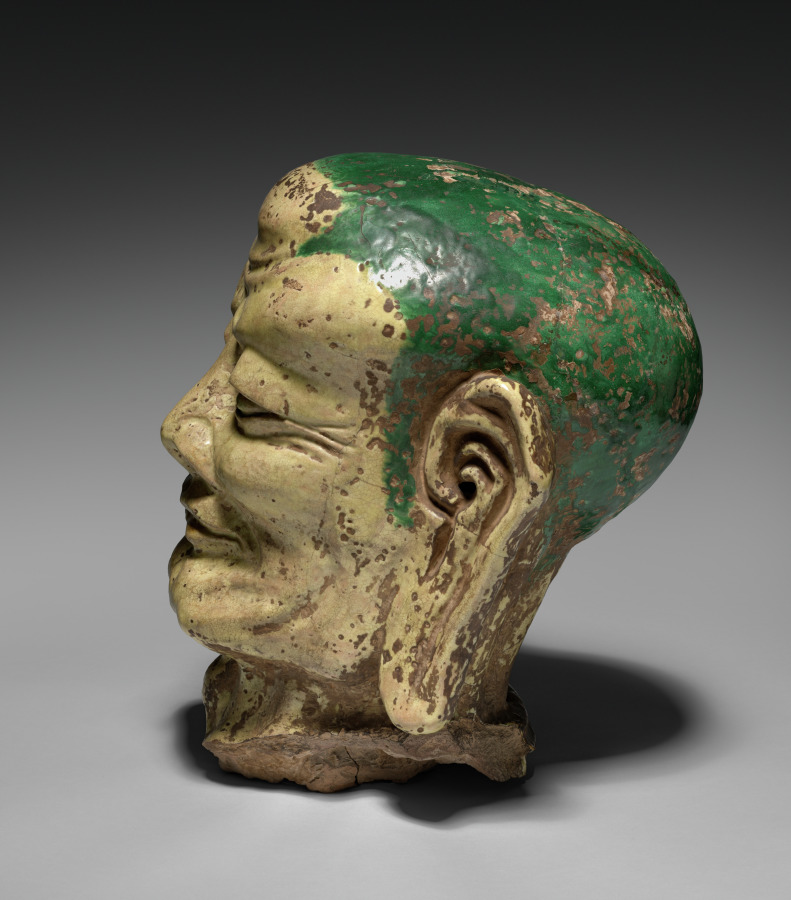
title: Head of a Lohan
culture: China, Ming dynasty (1368–1644)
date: 1368–1644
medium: earthenware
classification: Sculpture